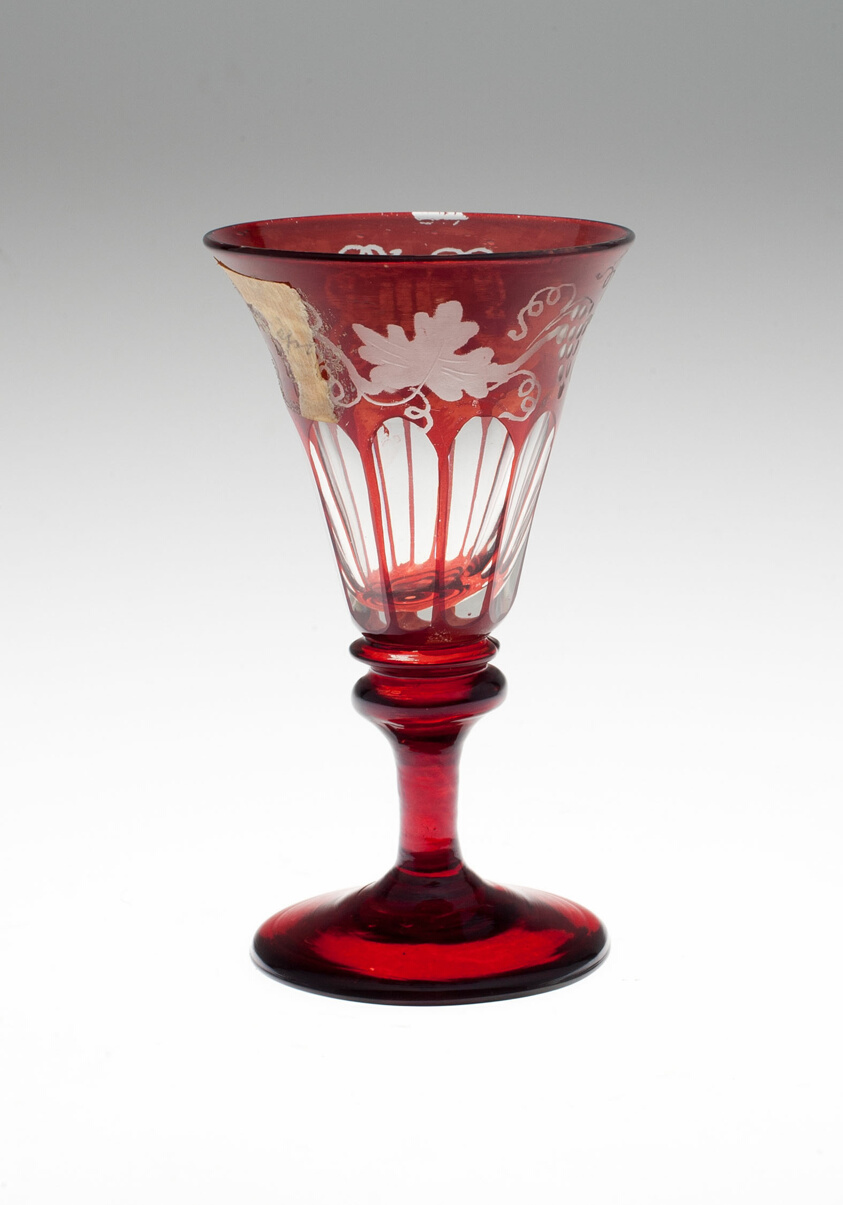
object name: Glass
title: Wine Glass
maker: Bohemia, Czech Republic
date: Mid to late 19th century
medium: Glass; blown, cut, stained red and engraved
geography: Bohemia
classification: drinking vessel; glass (object genre); glass